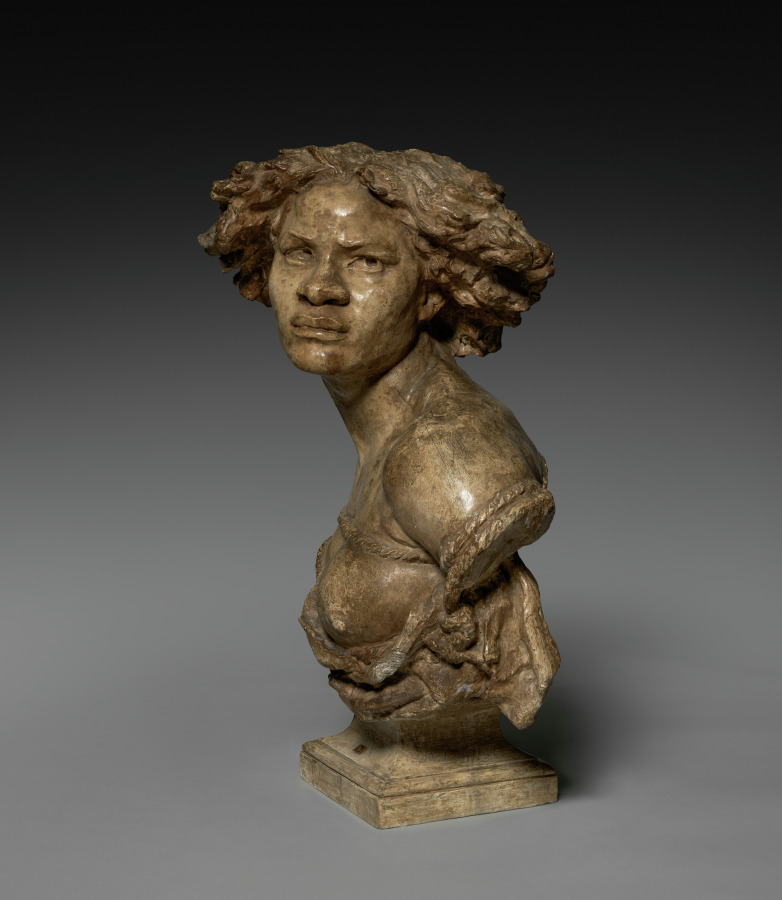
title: Why Born Enslaved!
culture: France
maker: Jean-Baptiste Carpeaux (French, 1827–1875)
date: 1867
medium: Plaster, original polychromed surface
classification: Sculpture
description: One of the most powerful expressions of abolitionist sentiment in the visual arts, Why Born Enslaved! depicts an African woman bound by ropes and looking defiantly upward. The ropes press painfully into her breasts; her torn blouse alludes to the violence responsible for her condition. The original, polychromed surface is covered with complex, nuanced hatchings and subtle modeling. Evidence indicates that this masterpiece of 19th-century French sculpture served as the master model for numerous casts in other museum collections.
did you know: Although officially abolished in France since 1848, slavery remained a hotly contested issue in Carpeaux’s time as it remained legal or tolerated in various countries around the world.